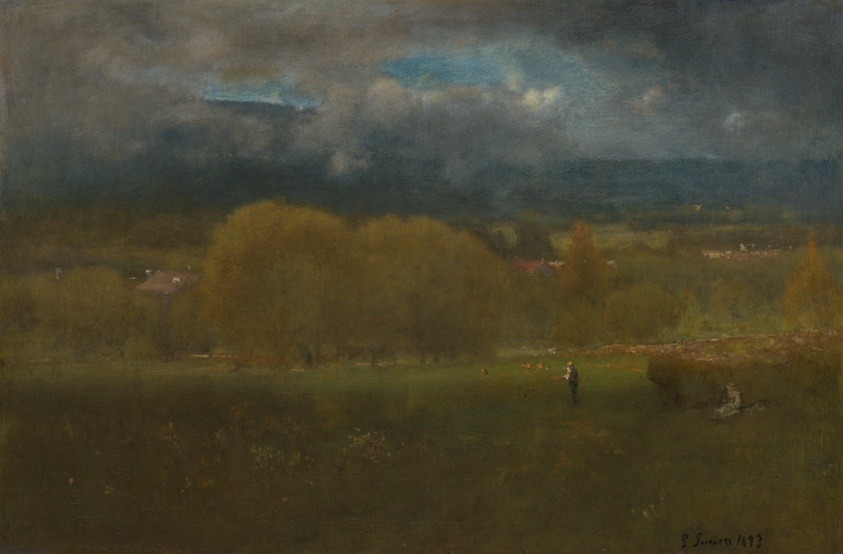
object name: Painting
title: Sunlit Valley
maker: George Inness (American, 1825–1894)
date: 1893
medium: Oil on canvas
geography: United States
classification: painting; american arts